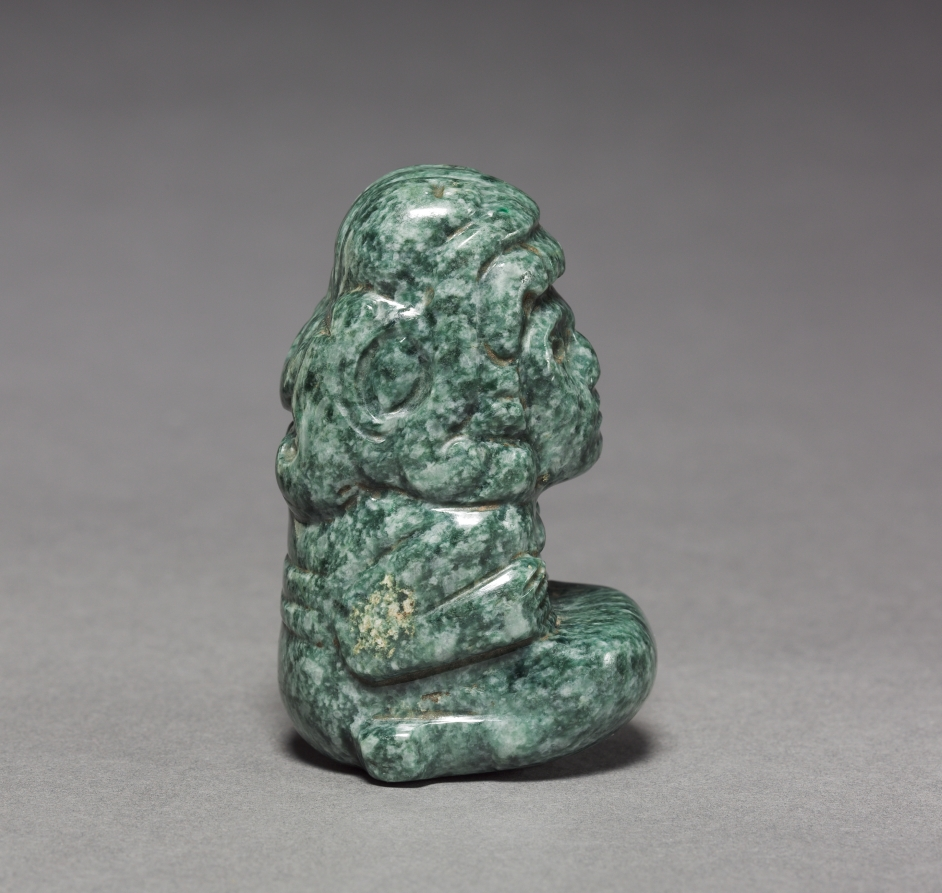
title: Female Figurine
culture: Central Mexico, Aztec, Post-Classic Period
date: 1325–1519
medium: jadeite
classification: Stone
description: Seated in typical female posture, this figurine probably represents an Aztec goddess or ritual impersonator. She wears a monster headdress, but her costume is simple, making specific identification difficult.